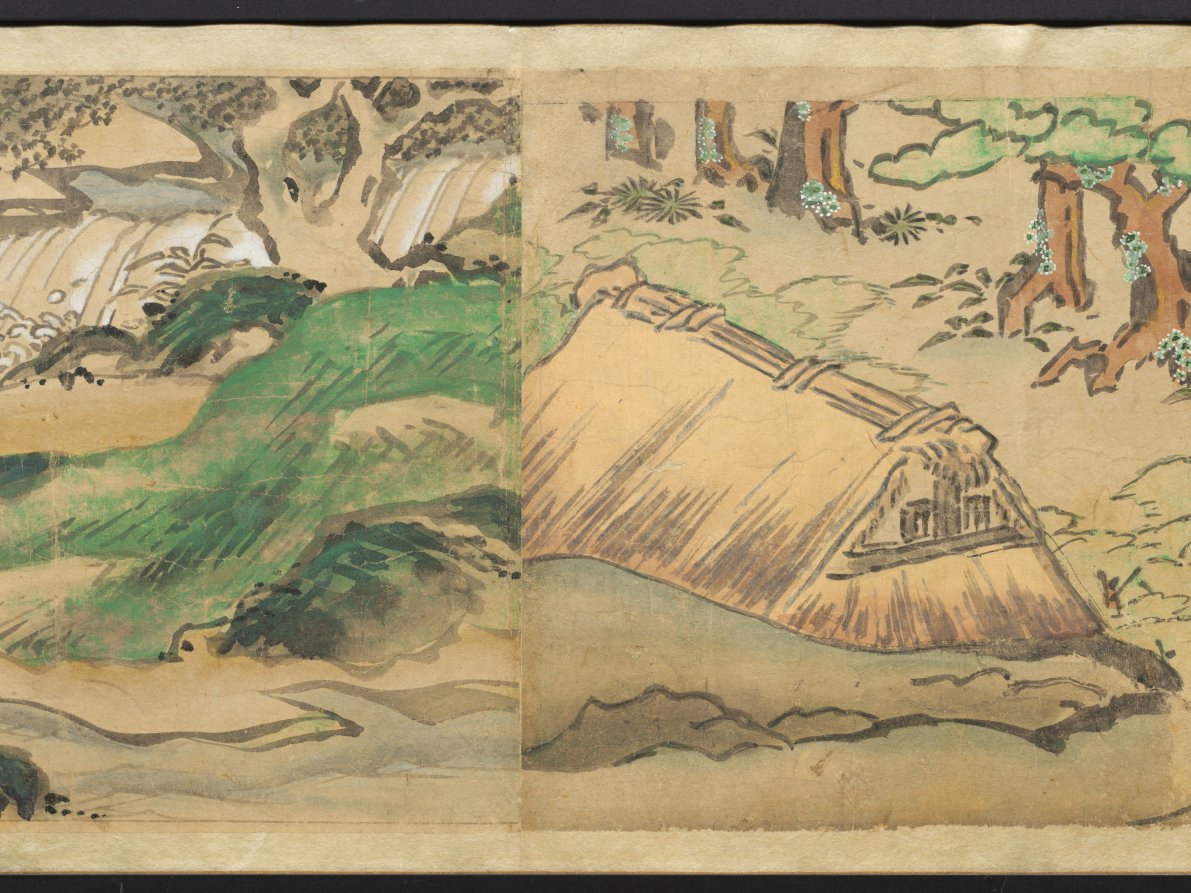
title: The Saltmaker's Story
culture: Japan, Edo period (1615–1868)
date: early 1600s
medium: One of a pair of handscrolls; ink, color, and gold on paper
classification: Painting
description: Once read and copied by girls at New Year’s celebrations and included in dowries, The Saltmaker’s Story is a rags-to-riches tale in which daughters are gifts from the gods. Despite his simple outlook, the main character progresses from humble roots as an associate at Kashima Shrine to the elite status of grandfather of the emperor through the intervention of the Kashima deity. The Saltmaker’s Story is traditionally presented in a set of three scrolls, but the text of this set has been removed by a previous owner, who remounted the illustrations as a pair. The paintings of this one take us from right to left through the first half of the tale.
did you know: This handscroll originally had texts before its paintings, but the texts were removed.